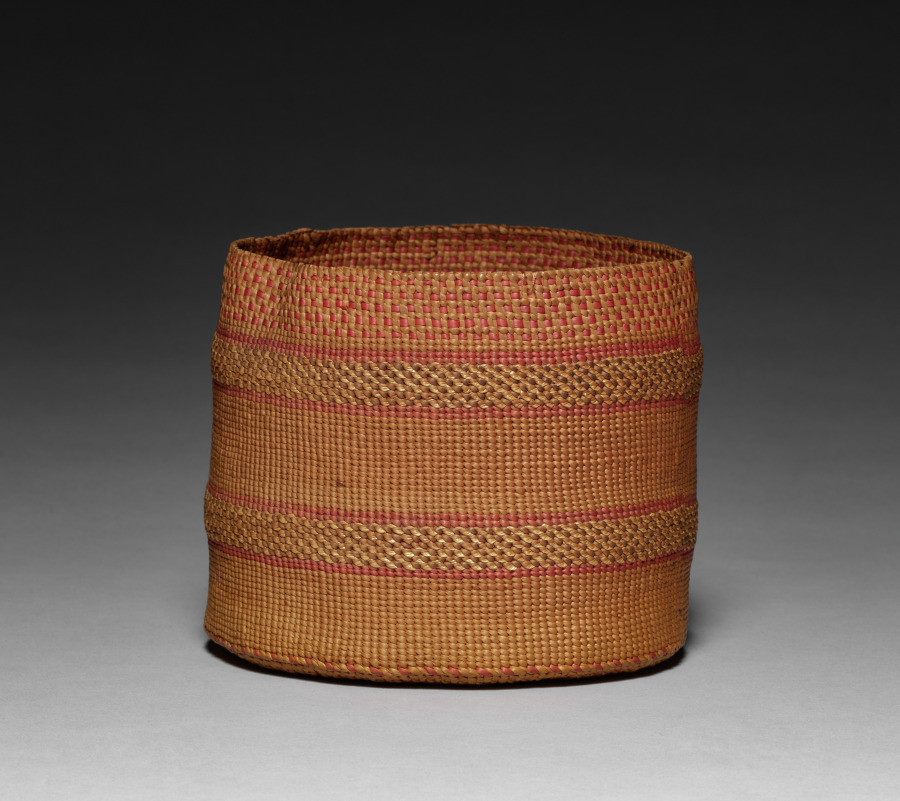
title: Basket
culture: Northwest Coast, Haida, Unassigned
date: Unassigned, before 1917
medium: twilled, imbricated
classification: Basketry